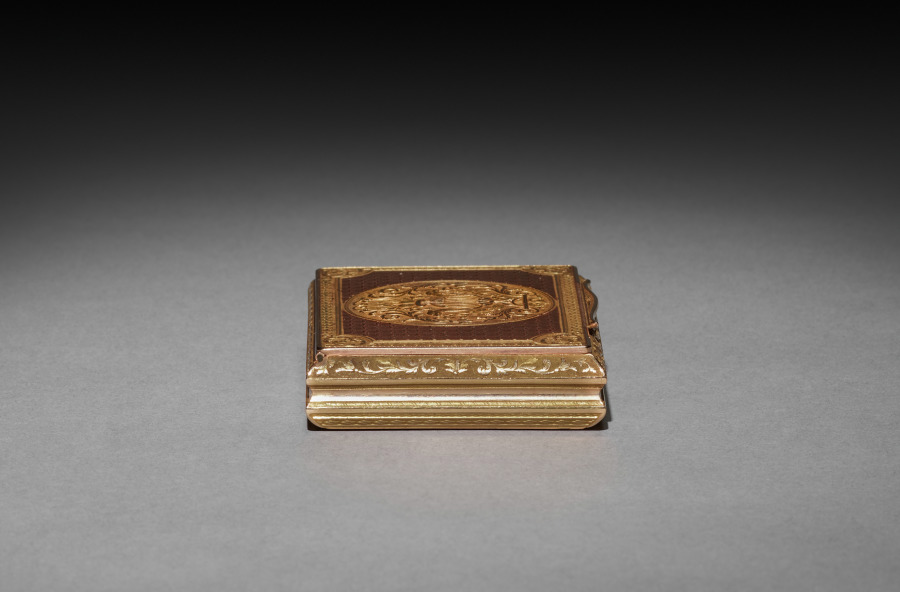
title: Snuff Box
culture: Switzerland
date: c. 1825–1850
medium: gold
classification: Miscellaneous